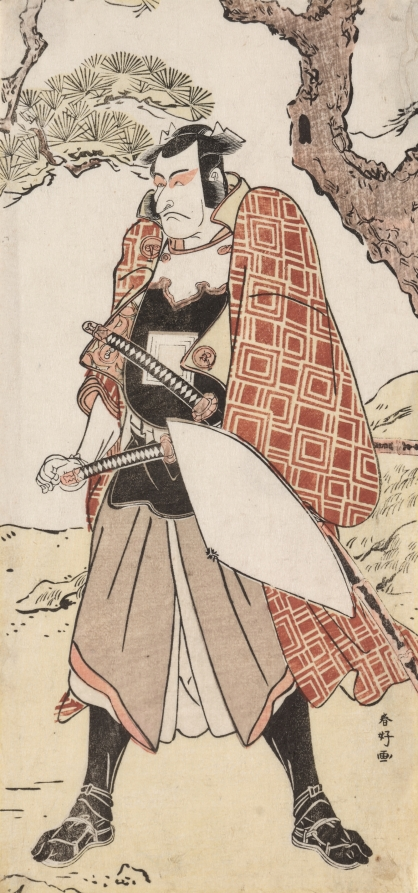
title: Ichikawa Danjuro V as a Travelling Warrior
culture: Japan, Edo period (1615–1868)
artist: Katsukawa Shunkō (Japanese, 1743–1812)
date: late 1780s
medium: color woodblock print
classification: Print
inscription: Signature: Shunko ga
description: Ichikawa Danjuro V was a talented onnagata (female impersonator) and writer.